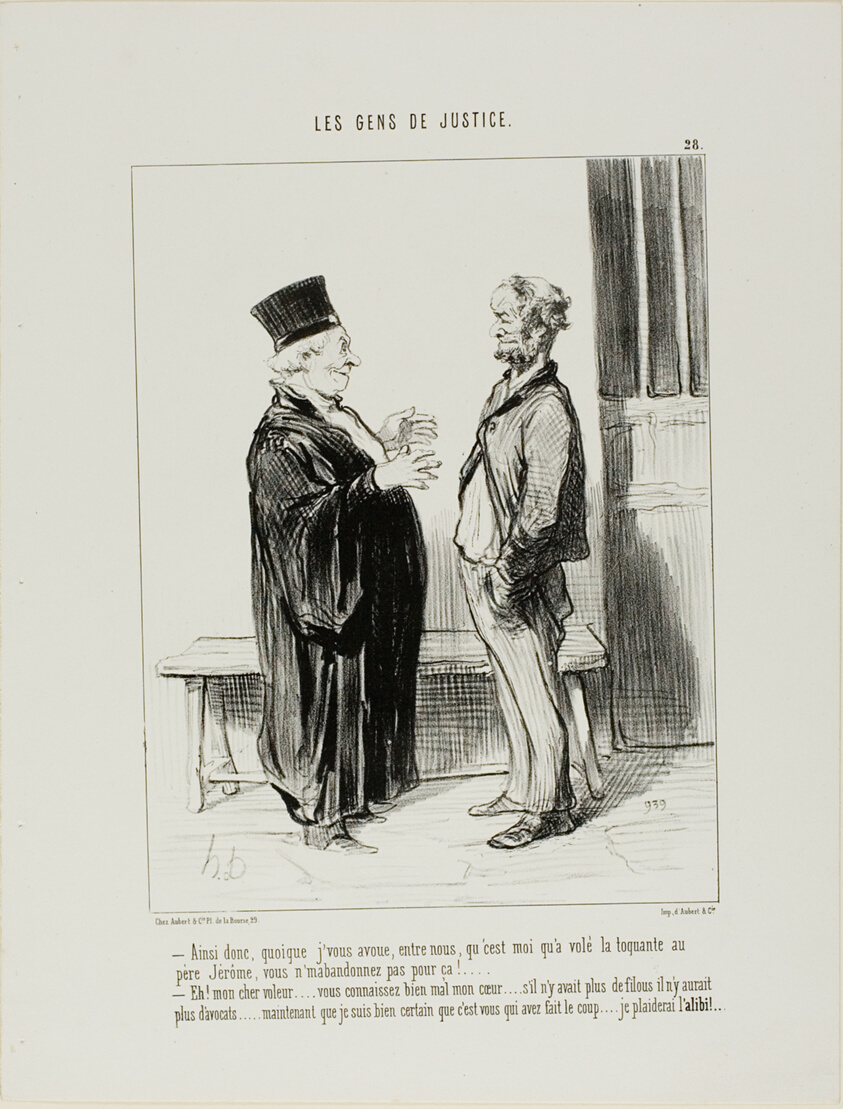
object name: Print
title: “- So even if I admit, between us, that I stole Father Jerome's watch, you won't drop my case? - My dear thief, you really don't understand my position... if there were no offenders there would hardly be any lawyers.... Now that I know you are guilty, I will work on your alibi...,” plate 28 from Les Gens De Justice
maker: Honoré Victorin Daumier; French, 1808-1879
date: 1846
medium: Lithograph in black on white wove paper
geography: France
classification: lithograph; print; prints and drawing